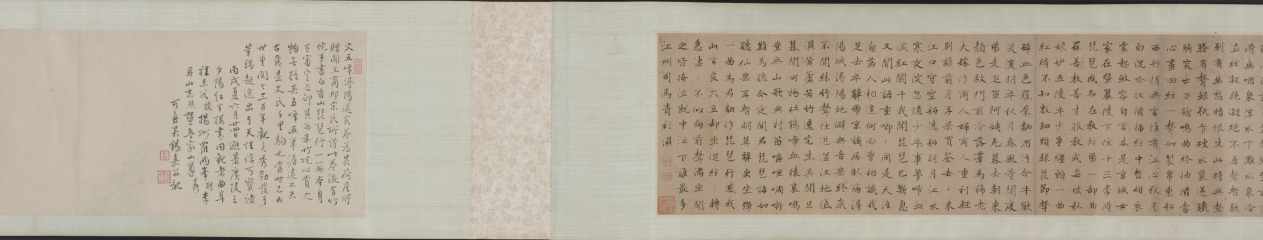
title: Saying Farewell at Xunyang (Song of the Pipa)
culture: China, Ming dynasty (1368–1644)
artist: Wen Boren (Chinese, 1502–1575)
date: 1500s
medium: handscroll, ink and color on paper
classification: Painting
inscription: "潯陽送客圖" 五峰山人文伯仁寫于停雲館中 [印] 文伯仁; 五峰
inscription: 2 colophons and 9 additional seals: 1 transcription of "Pipa xing 琵琶行” (Song of Pipa) and 3 seals of Zhu Yizun 朱彜尊 (1629-1709); 2 seals of Wu Rongguang 吳榮光 (1773-1843); 1 colophon, dated 1826, and 3 seals of Wu Xijia 吳錫嘉 (mid-1700s)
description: This handscroll depicts The Song of the Pipa, a poem by Bai Juyi 白居易 (772–846) written after the poet’s encounter with a pipa player on the Yangzi River. Expelled from her home city when her beauty and fame had faded, she played for the poet at night. Her musical performance and tragic life story resonated with Bai Juyi, who had just been demoted and exiled from life at court himself. The hazy, vast view and pale color tonalities of this painting illustrate these feelings of endless sadness, having lost one’s sense of purpose in life.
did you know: Wen Boren depicted the chilly autumn water with a fishnet pattern.